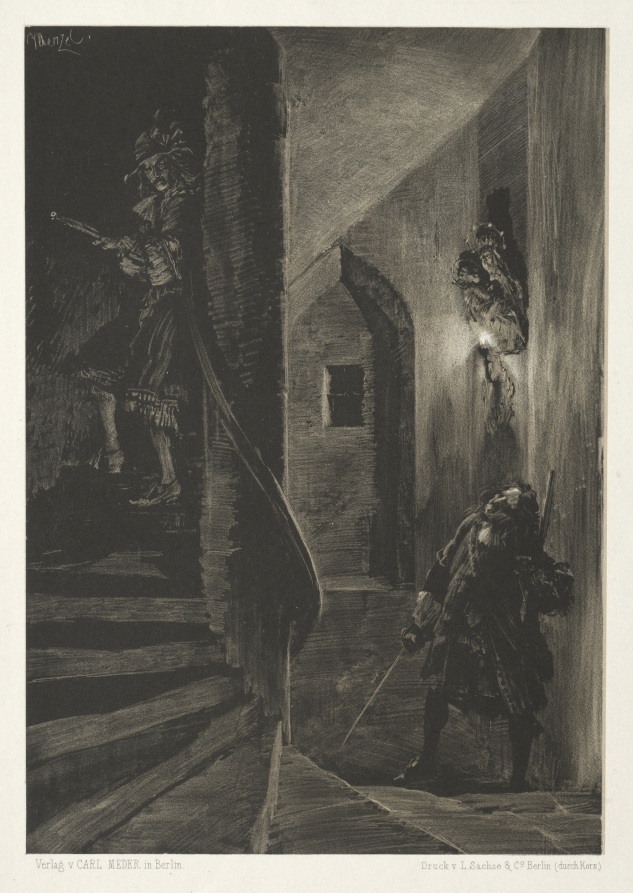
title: Essay on Stone with Brush and Scraper: Chase on the Winding Staircase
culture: Germany, 19th century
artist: Adolph von Menzel (German, 1815–1905)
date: 1851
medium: lithograph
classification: Print